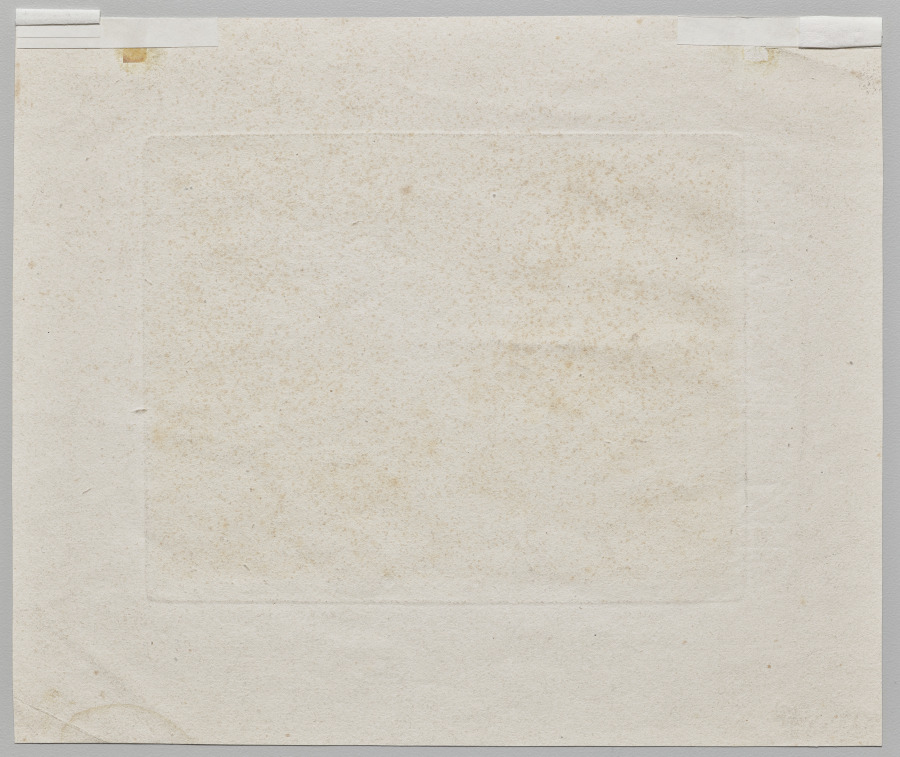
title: Norwegian Seacoast During a Storm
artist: Johan Christian Clausen Dahl (Norwegian, 1788–1857)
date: 1819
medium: etching, open-bite, black ink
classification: Print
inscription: Signed and dated in the pale below image, lower left: Dahl, 1819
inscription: Watermark: IN. BASEL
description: Johan Christian Clausen Dahl depicted his native Norway in dramatic landscapes that used figures to evoke the grandiose scale of nature. This etching—one of four created by the artist—shows the aftermath of a storm. A ship floats damaged in the distance while a man and his dog sit despondent on a massive rock nearby. Dahl rendered the sky and churning waves in jagged etched lines that suggest the violent movement and force of the sea outside Bergen, where he grew up. He considered this composition to be among his very best works.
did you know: Johan Christian Clausen Dahl described this print in his diary as depicting “the morning after a stormy night where a man has escaped from a ship stranded on the rocks.”